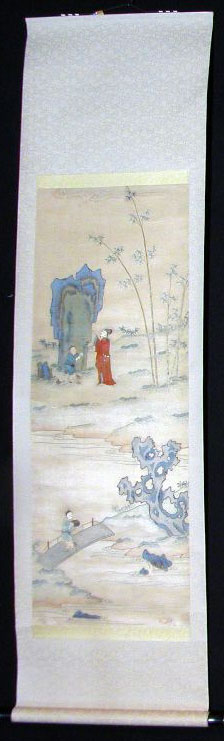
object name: Textile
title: Scroll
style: qing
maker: China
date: Qing dynasty (1644–1911), c. 1720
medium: Panel: silk, satin weave; embroidered with silk in satin and stem stitches; painted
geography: China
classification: textile; needlework (visual works)